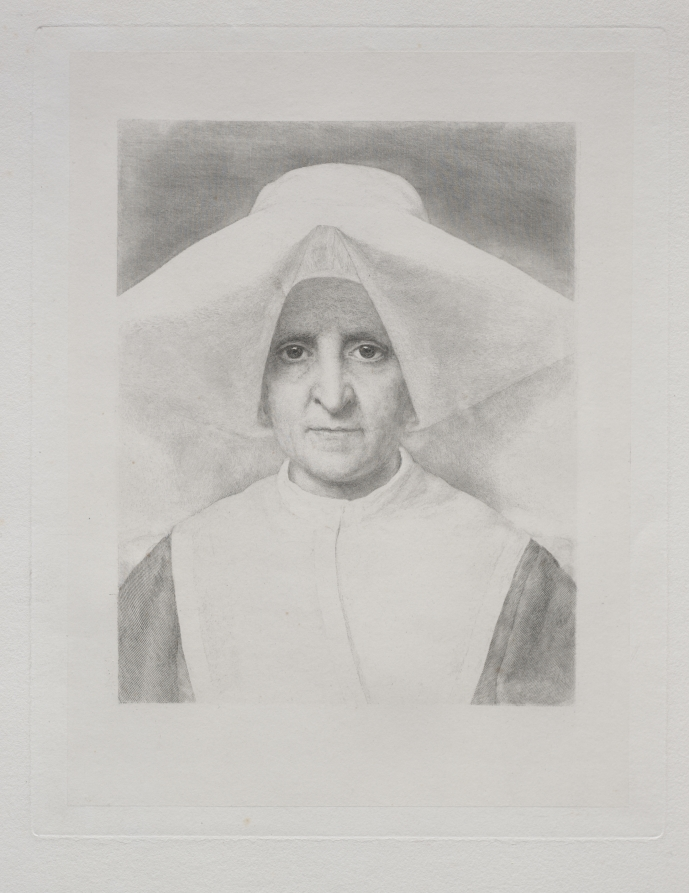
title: Sister Rosalie, Front View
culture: France, 19th century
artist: Claude-Ferdinand Gaillard (French, 1834–1887)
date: 1886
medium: engraving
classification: Print